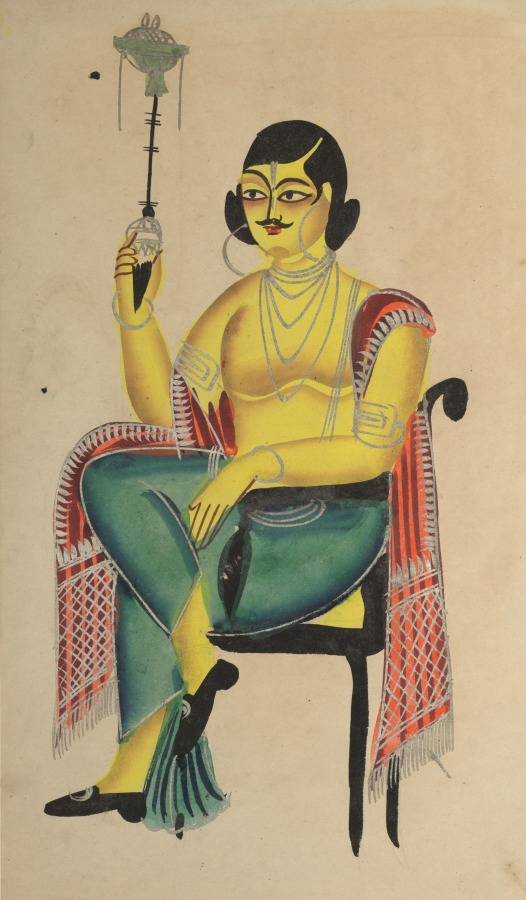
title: English Babu (Native Indian Clerk) Holding a Hookah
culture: Eastern India, Bengal, Kolkata, Kalighat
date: c. 1890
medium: Gum tempera, graphite, ink, and tin on paper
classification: Painting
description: This is an archetypal satirical caricature of a native Indian clerk (babu), a Bengali dapper dandy whose fashion sense combines British and Indian mores with dissonant results. Imitating his British masters, he sits cross-legged on a Victorian chair, holding a hookah, sporting a Prince Albert hairstyle, and wearing European buckled shoes. His posture models popular photo studio portraits of the time. Kalighat painters ridiculed these vain babus as foppish nouveau riche.